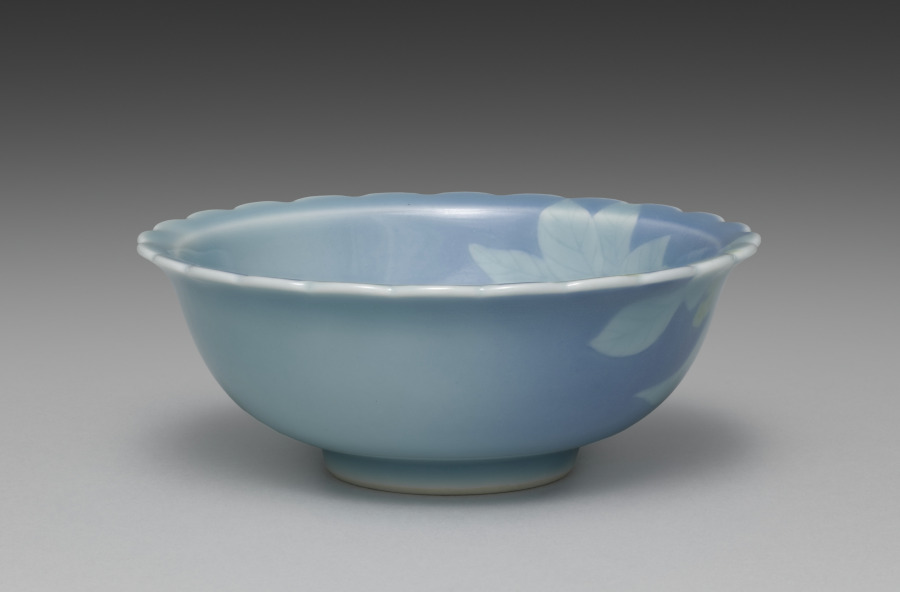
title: Dish from Dishes with Flowers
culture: Japan, Taishō period (1912–26) or Shōwa period (1926–89)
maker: Seifū Yohei IV (Japanese, 1872–1951)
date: 1914–46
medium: One from a set of five dishes; porcelain with underglaze yellow and blue glaze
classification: Ceramic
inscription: 清風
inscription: 清風造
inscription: 成山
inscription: 清風盧人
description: One can imagine a cool summer breeze when looking at this set of dishes, each shaped with a crenulated mouth and glazed with blue. Around the rim and into the basin, the bowls have low-relief designs of flowers with underglaze yellow petals; their leaves and stems show white through the glaze. On each dish, the design continues over the rim onto one side.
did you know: Seifū Yohei IV’s dishes with flowers feature underglaze yellow.